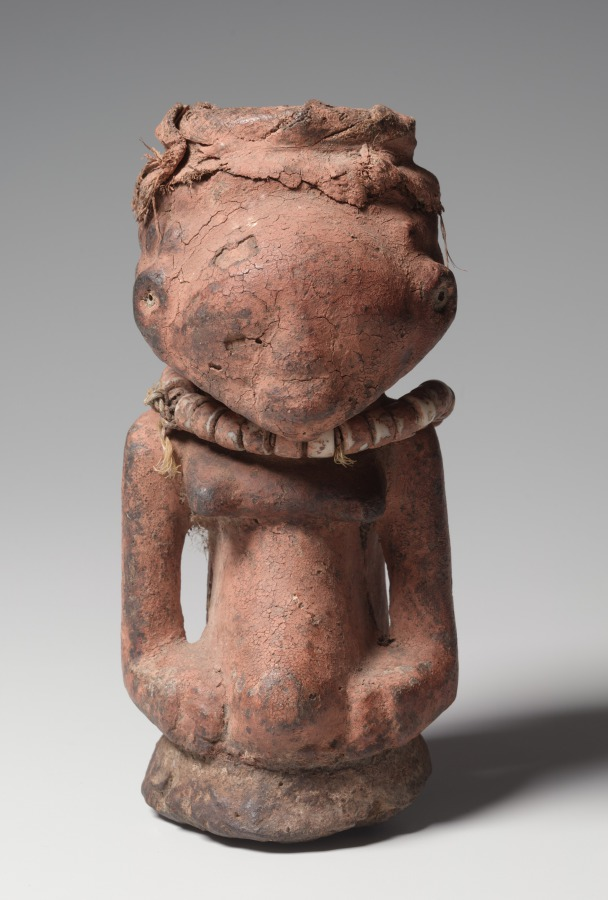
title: Figure (Nkishi)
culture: Africa, Central Africa, Democratic Republic of Congo, Luba-style maker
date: late 1800s–early 1900s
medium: Wood, organic materials (including resin and soil), plant fiber, and glass beads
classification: Sculpture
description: The substances contained in its cloth-covered cranial cavity indicate that this half-figure belongs to the broad category of charms or “power objects” that the Luba call mankishi. It was used by a ritual expert and functioned in a variety of rituals dealing with healing, protection, divination, or jurisdiction. Often such power figures were carved by the ritual experts rather than by professional artists.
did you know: Unlike most Luba arts, this figure is not connected to the royal court.